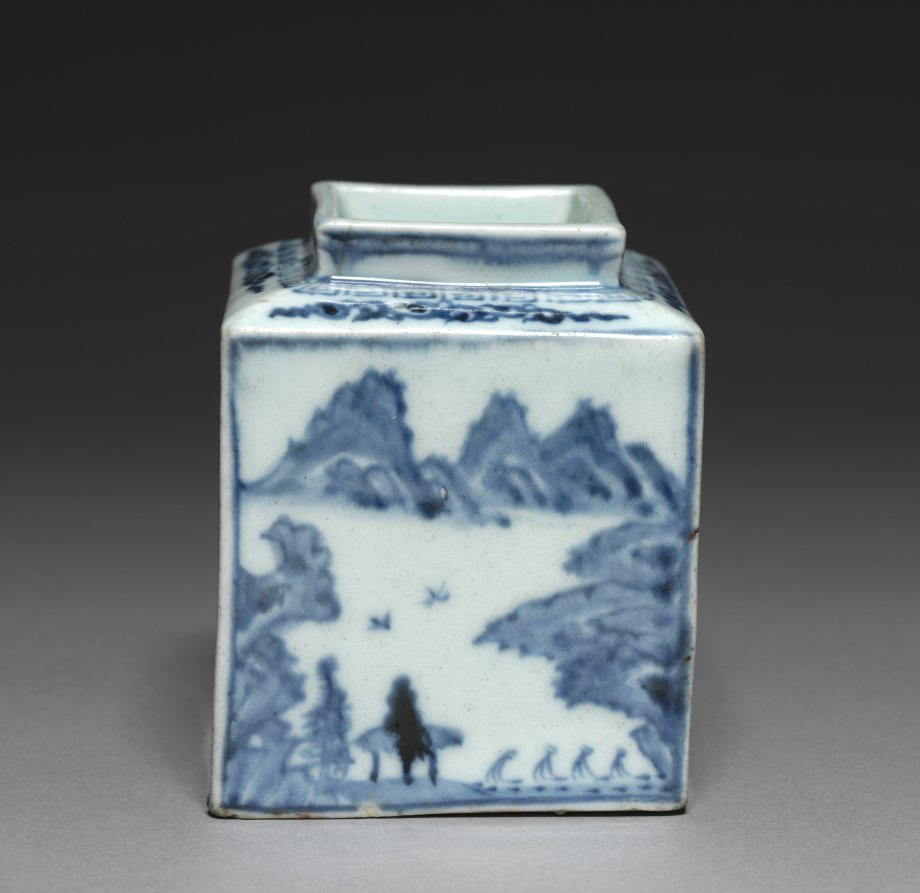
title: Square-shaped Bottle with the Scenery of the Han River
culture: Korea, Joseon dynasty (1392–1910)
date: 1800s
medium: porcelain with underglaze cobalt blue decoration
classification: Ceramic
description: The depicted scenery of this bottle is the Han River, the principal river crossing the center of Seoul. Since the 1700s, Korean artists began to paint the real landscape of Korea instead of imaginary ones of the Chinese tradition. This blue-and-white porcelain bottle is presumably a water dropper for ink. Each facet was separately made and put together before firing in a kiln. Both the landscape motif and faceted bottle were in vogue in the late 19th century, largely produced to meet the growing demand from the elite class.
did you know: The Han River is the principal river crossing the center of Seoul.